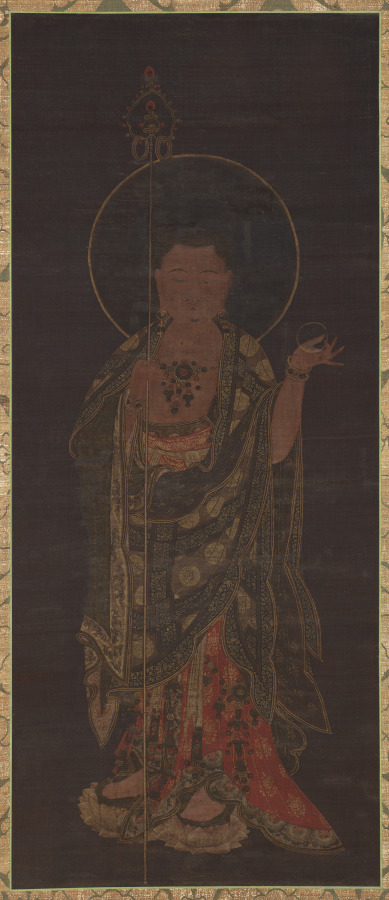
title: Standing Ksitigarbha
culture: Korea, Goryeo dynasty (918–1392)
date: 1300–1350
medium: Hanging scroll; ink, color, and gold on silk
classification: Painting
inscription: 青龍公用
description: This fourteenth-century hanging scroll depicts Kṣitigarbha (지장보살), the Bodhisattva of Salvation in the guise of a youthful Buddhist monk. Clad in simple monastic robes, he holds a staff to announce his presence and a wish-fulfilling jewel symbolizing his vow to relieve suffering. Kṣitigarbha is believed to descend into the underworld to guide and liberate tormented souls trapped in purgatory. His compassionate mission made him a key figure in both East Asian visual and ritual tradition.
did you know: Only 10 of the 14th-century paintings of Ksitigarbha are known to exist in the world today. This is one of these rare surviving masterpieces.